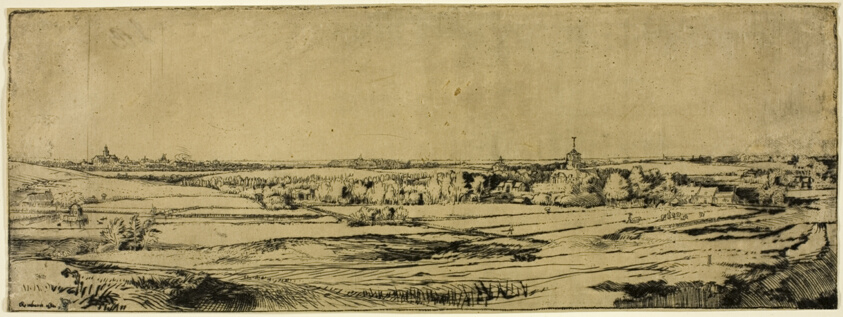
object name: Print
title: Panorama Near Bloemendaal Showing the Saxenburg Estate (The Goldweigher's Field)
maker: Rembrandt van Rijn (Dutch, 1606-1669)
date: 1651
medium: Etching and drypoint in black on cream Japanese paper (discolored to tan)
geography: Holland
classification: etching; print; prints and drawing; paper; drypoint